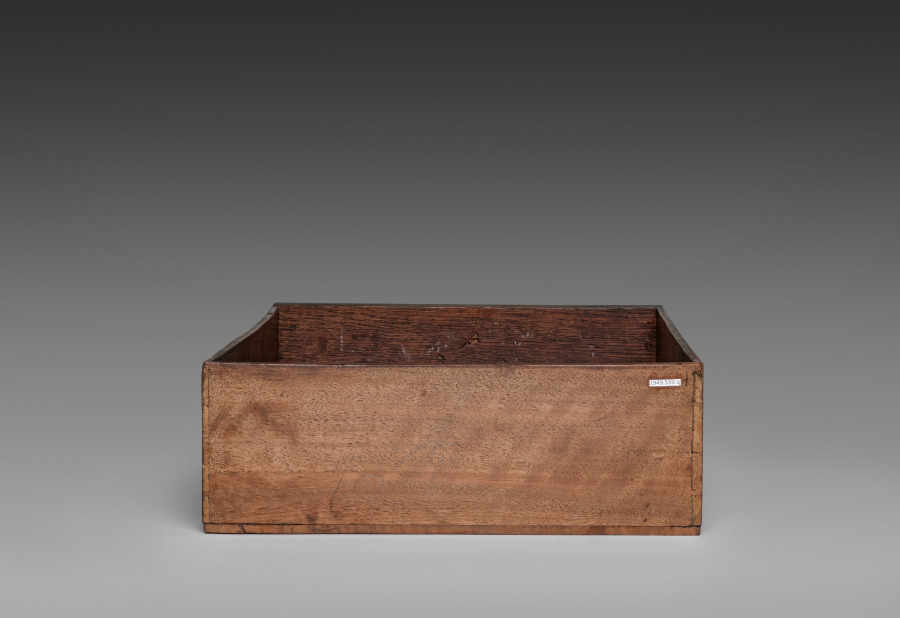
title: Interior Drawer for Cabinet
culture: France, late 17th Century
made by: André-Charles Boulle (French, 1642–1732)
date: c. 1690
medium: ebony, marquetry in metal and tortoise shell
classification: Furniture and woodwork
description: Appointed cabinetmaker to King Louis XIV in 1672, André-Charles Boulle became a master of furniture making in France during the late 1600s until his death in 1732. Known primarily for his use of marquetry, in which metal patterns are inlaid into tortoiseshell then applied within the veneered surface of the furniture, Boulle established a level of quality and craftsmanship few others could achieve. As a result, his work found favor at the royal court and among other aristocrats and diplomats eager to impress the king. The inclusion of a medallion depicting Louis XIV within the bronze decoration of this chest would have identified the owner with the royal court. Often exhibiting stout architectural proportions with elegant groups of inlaid motifs such as the parrot on the central panel of this chest, Boulle’s designs are an example of the intellectual fashion for contrasting ideas, materials, and motifs.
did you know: Originally designed to sit atop an elaborate tall stand, this chest was likely altered in the late 1700s to reduce its scale and height.